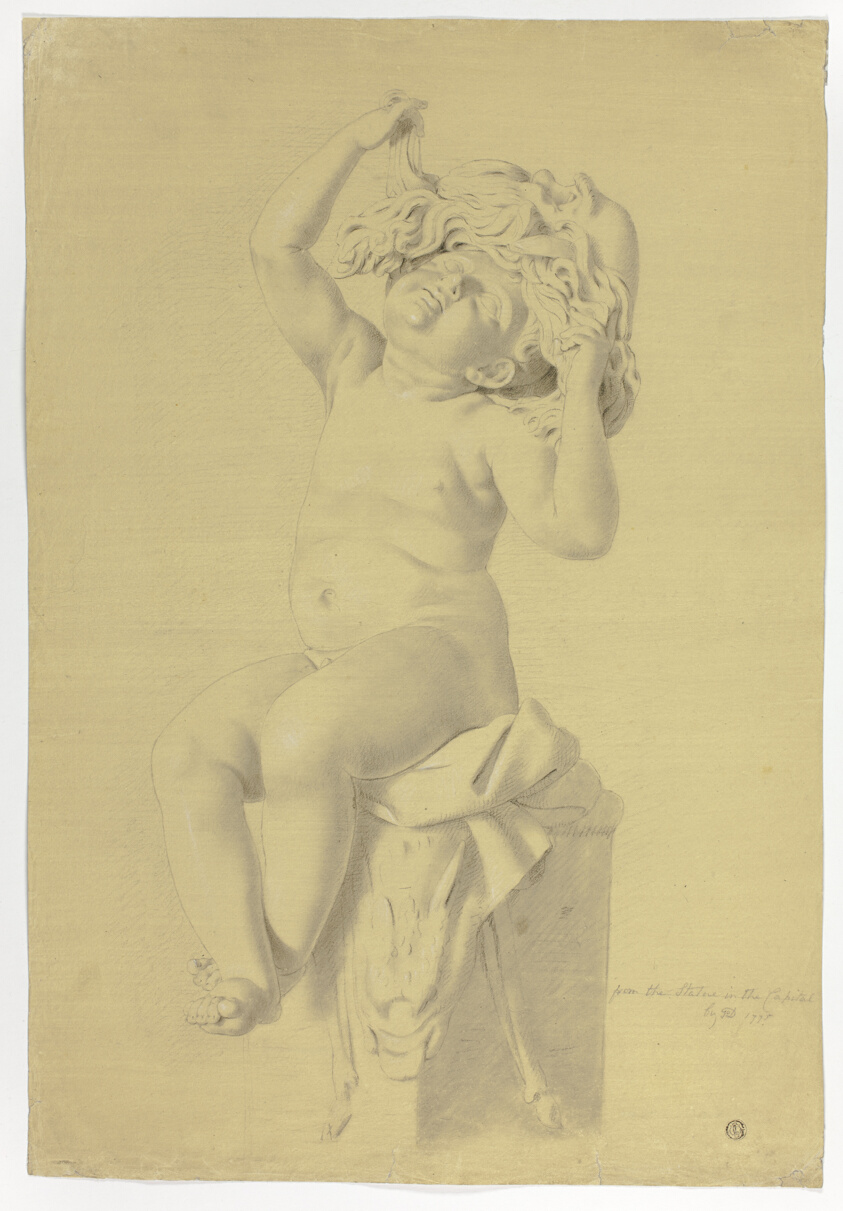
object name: Drawing and Watercolor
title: Antique Statue of Seated Putto Holding Mask of Silenus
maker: John Downman (English, 1750-1824)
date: 1775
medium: Charcoal, with stumping, and black crayon, heightened with white chalk, on ivory laid paper, prepared with a tan ground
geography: England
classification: chalk; drawings (visual works); prints and drawing